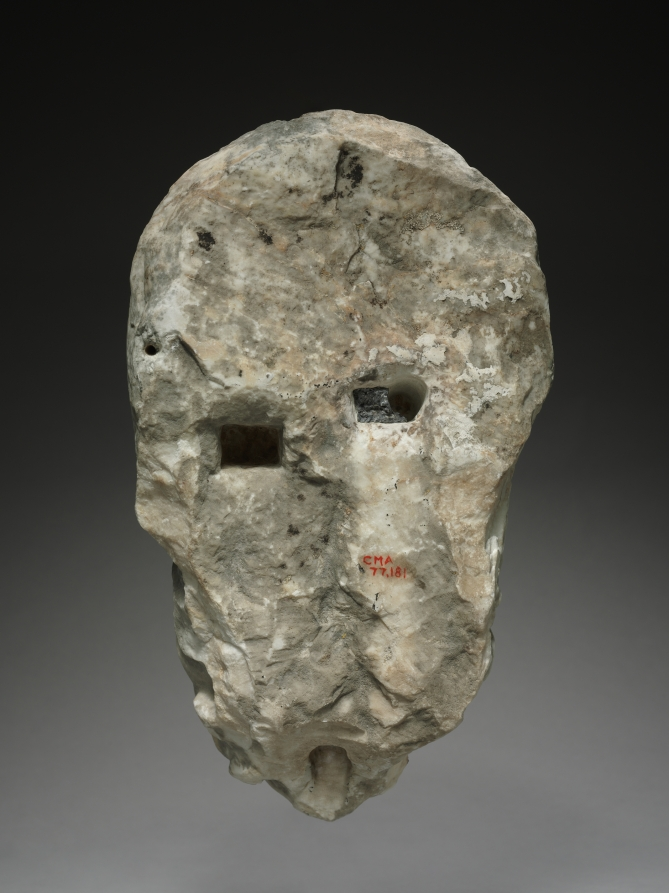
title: Head of a Prophet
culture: Italy, Siena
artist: workshop of Giovanni Pisano (Italian, c. 1240-c. 1320)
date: c. 1300–1325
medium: marble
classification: Sculpture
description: This head exhibits many of the characteristics of the style associated with the workshop of Giovanni Pisano. These are particularly noteworthy in the sensitive carving of the haunting face and its strikingly drilled beard. The head compares favorably to the sculpture made while Giovanni was master of works at Siena Cathedral (1285-97). Recent research suggests that it may once have belonged to a full-length Old Testament prophet looming on the exterior of Siena Cathedral.